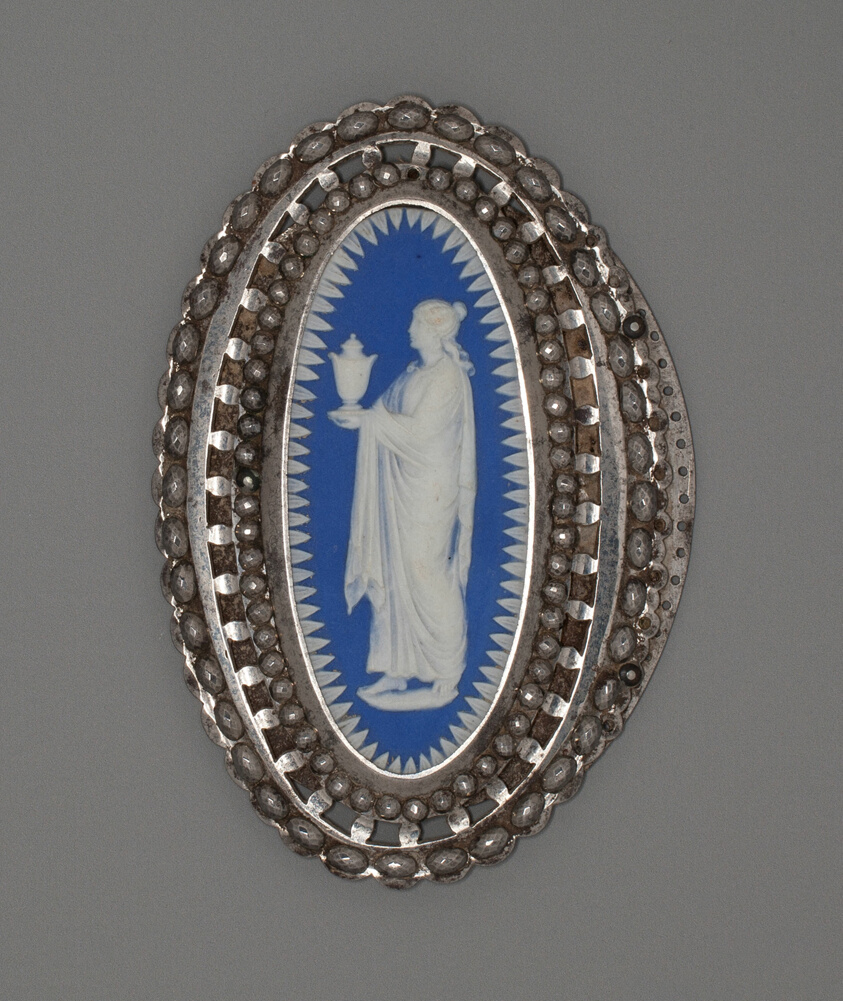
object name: Ceramics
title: Buckle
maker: Wedgwood Manufactory (England, founded 1759)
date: Late 18th century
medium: Stoneware (jasperware)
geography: Burslem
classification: buckle (strap accessory); accessories (object genre); costume accessory; stoneware; european decorative arts; ceramics